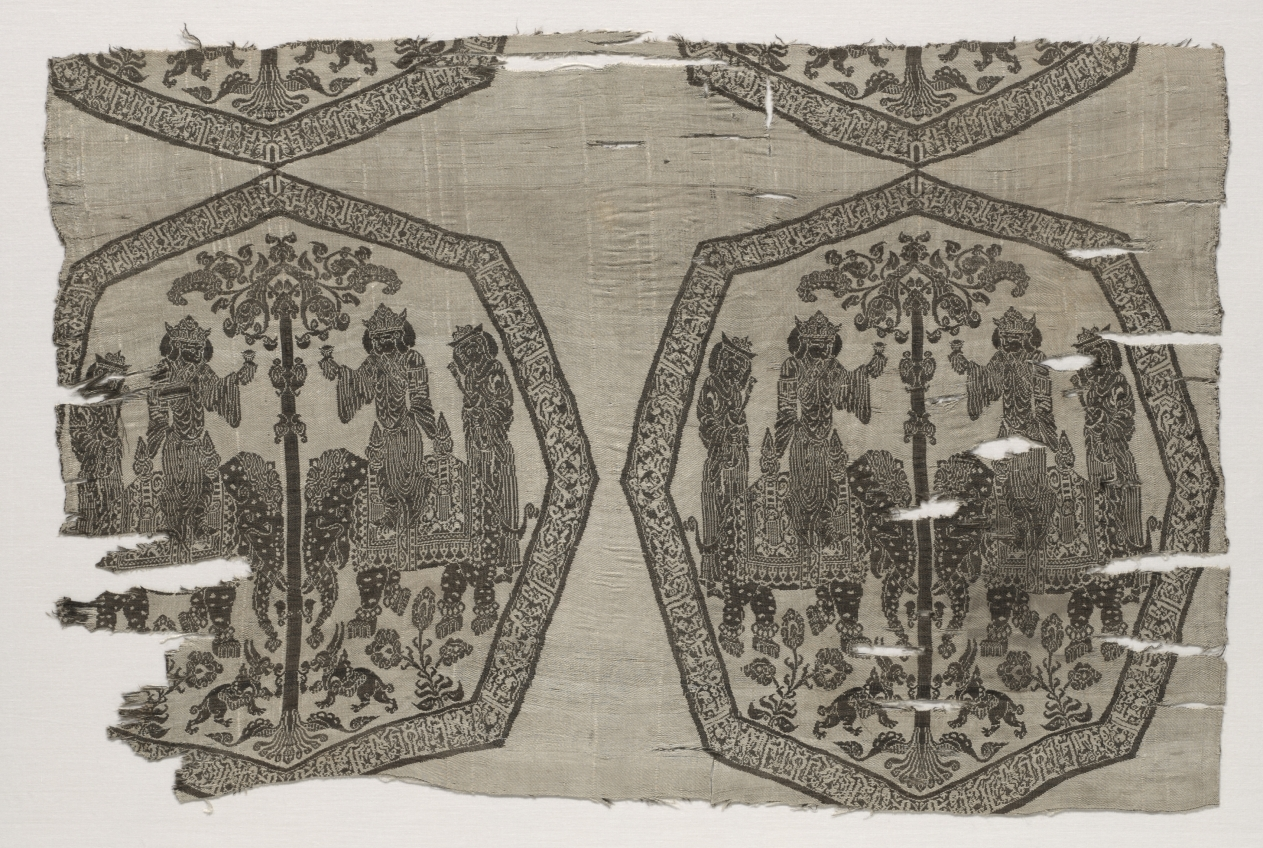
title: Fragment with Inscription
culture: Iran, in the style of the Buyid period (945–1055) or Seljuq period (1037–1194)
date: before 1986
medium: Silk: compound weave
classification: Textile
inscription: The Arabic inscription framing the octagons reads: "la muhkam [?] bi-amr[?] al-'aysh al-ayyam fa'itah wal-dahr munsarif wal-'aysh munqarad (There is nothing firm [?] with respect to [?] life: the days go by, time passes, and life is cut off."